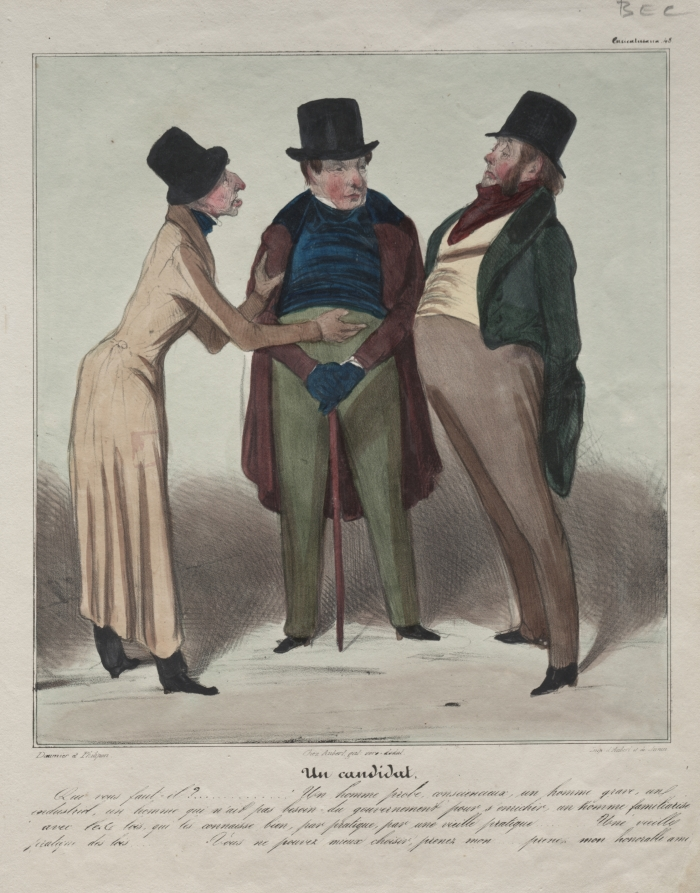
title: A Candidate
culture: France, 19th century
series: Caricaturana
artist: Honoré Daumier (French, 1808–1879)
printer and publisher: Aubert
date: 1837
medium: lithograph with watercolor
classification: Print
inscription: Upper margin, pencil: BEC ; Lower margin, printed: Daumier et Philipon / Chez Aubert gal vero. dodat / Imp. d'Aubert et de Junca ; pencil: 46.213 / Del.II.403, II/II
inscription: Above image, printed: Caricaturana 48 ; Below image, printed: Un candidat. / Qui vous faut-il?......... Un homme probe, consciencieux, un homme grave, un / industriel, un homme qui n'ait pas besoin du gouvernement pour s'enricher, un homme familiarisé / avec les lois, qui les connaisse bien, par pratique, par une vieille pratique......... Une vieille / partique des lois......... Vous ne pouvez mieux choisir, prenez mon..... prenez mon honorable ami.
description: This print was first published in Le Charivari (May 18, 1837) as plate 48 from the series Caricaturana.